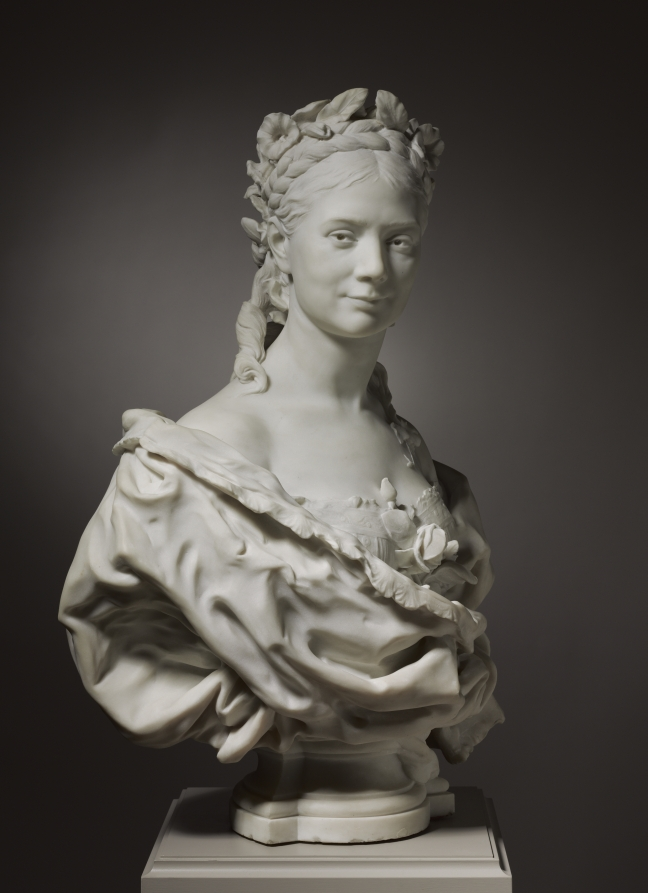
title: Bust of a Lady (possibly Fanny Coleman)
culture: France, 19th century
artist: Jean-Baptiste Carpeaux (French, 1827–1875)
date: 1872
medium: marble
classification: Sculpture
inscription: inscribed on base: J. Bte CARPEAUX 1872.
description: Abandoning the strict frontality and symmetry of the neoclassical style, Carpeaux was instead inspired by French portrait busts of the 1600s and 1700s. This bust probably depicts Fanny Coleman, an English actress with whom Carpeaux may have had a romantic relationship. The turn of the head and the undulating drapery infuse the figure with a sense of drama. Patronized by Napoleon III, Carpeaux created the celebrated figural group La Danse for the facade of the Opera Garnier in Paris, a work renowned for its sensual nudes, but denounced by contemporaries as an affront to public decency.